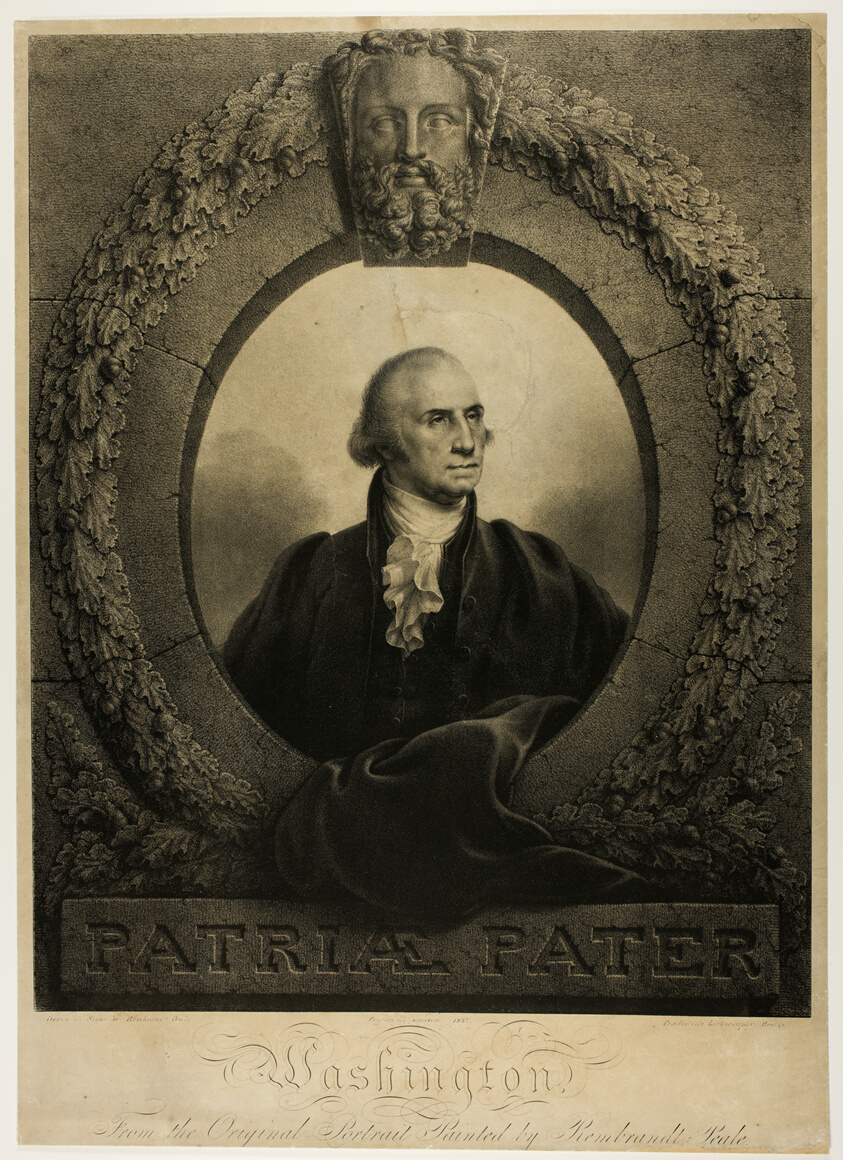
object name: Print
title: Washington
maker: Rembrandt Peale (American, 1778–1860); printed by Pendleton's Lithography (American, active 19th century)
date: 1827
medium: Lithograph in black on cream wove paper, laid down on thick cream wove paper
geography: United States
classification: lithograph; print; prints and drawing